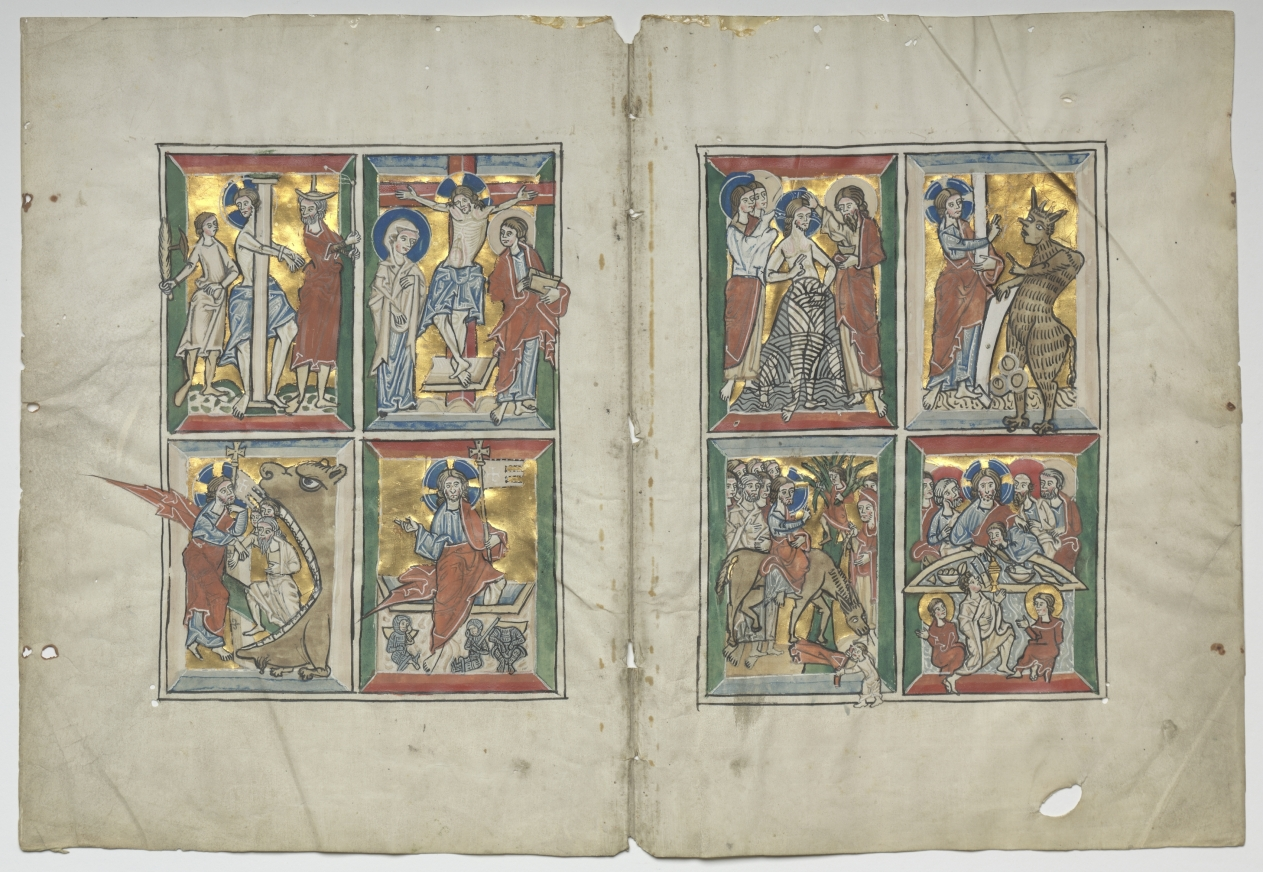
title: Bifolio with Scenes from the Life of Christ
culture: Germany, Lower Saxony (Diocese of Hildesheim), Braunschweig(?), 13th century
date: 1230–1240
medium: tempera, and gold on vellum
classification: Manuscript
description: A sheet of vellum (animal skin) folded down the center to create two leaves, or folios, is called a bifolium (plural: bifolia). This pair of bifolia originally were to have been inserted one inside the other, forming part of a large psalter, or book of the psalms. The small paintings, called miniatures, decorating each leaf are subdivided into four small panels and illustrate the life of Christ. This particular format, along with the style of decoration, tells us that the psalter was made in North Germany, in the Diocese of Hildesheim. In northern Europe, after 1050, a tradition emerged of illustrating psalters with scenes of the life of David (the author of the Psalms) and the life of Christ. This juxtaposition implied a shared ancestry, since Christ was a descendant of the House of David. In the parent volume these miniatures may have been accompanied by a David cycle.